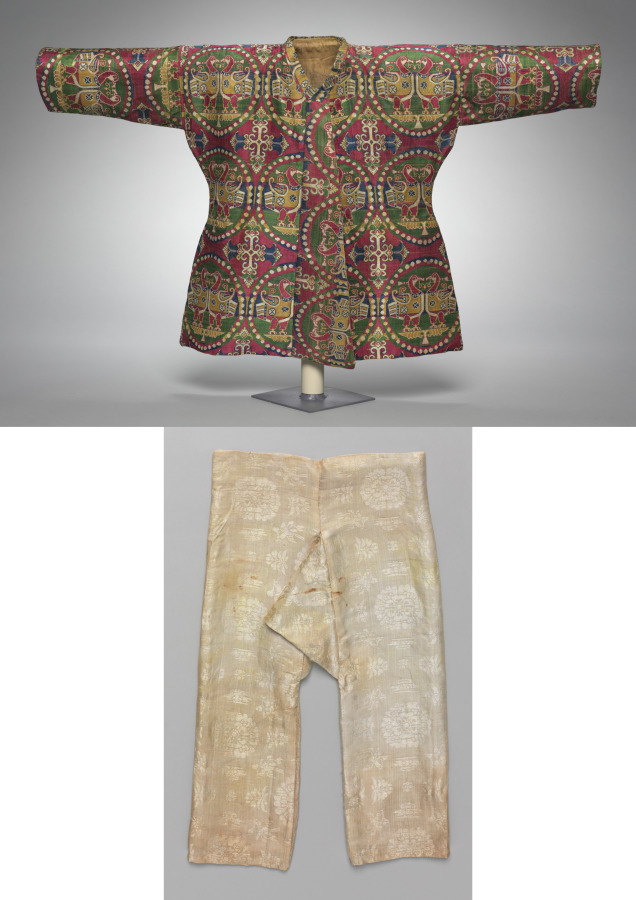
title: A Child’s Coat with Ducks in Pearl Medallions and a Child's Pants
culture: Iran or Central Asia, Sogdiana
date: 700s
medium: silk; weft-faced compound twill, samit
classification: Garment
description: This luxurious silk coat for a young prince displays ducks in pearl roundels alternating with cross-shaped lotus blossoms woven in five radiant colors of silk. The ducks are adorned with imperial motifs adopted from the previous Sasanian dynasty in Iran including pearl collars, flying ribbons, and a jeweled necklace in their beaks. This silk was woven in Iran or Sogdiana; however, it is lined with Chinese silk damask and has a pair of pants also made with Chinese silk damask, both decorated in an 8th-century style of the Tang Dynasty.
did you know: Given the coat’s pristine condition, it is unclear whether it was ever worn, or if it was used instead as a diplomatic gift or perhaps as currency.